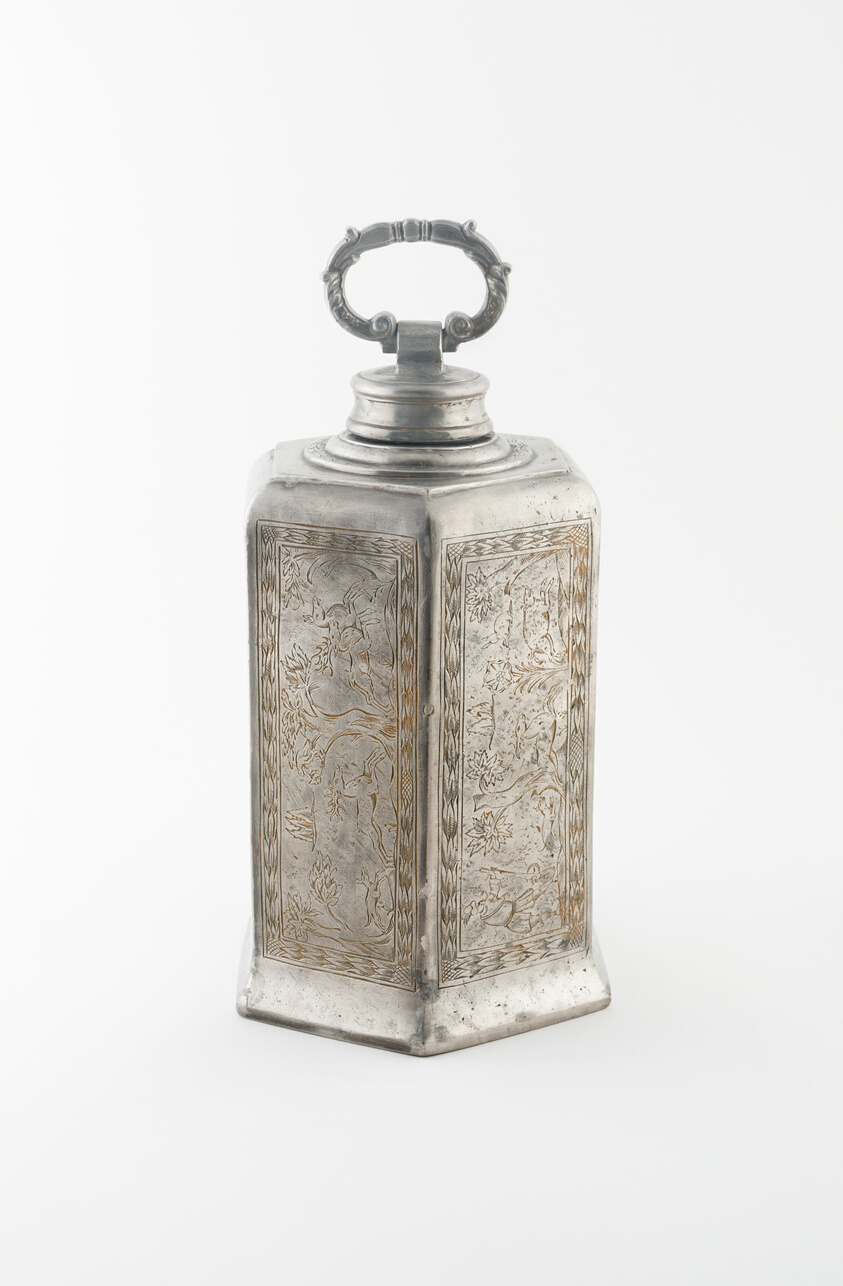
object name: Metalwork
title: Wine Can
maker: Germany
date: c. 1700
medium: Pewter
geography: Germany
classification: pewter; metalwork; european decorative arts